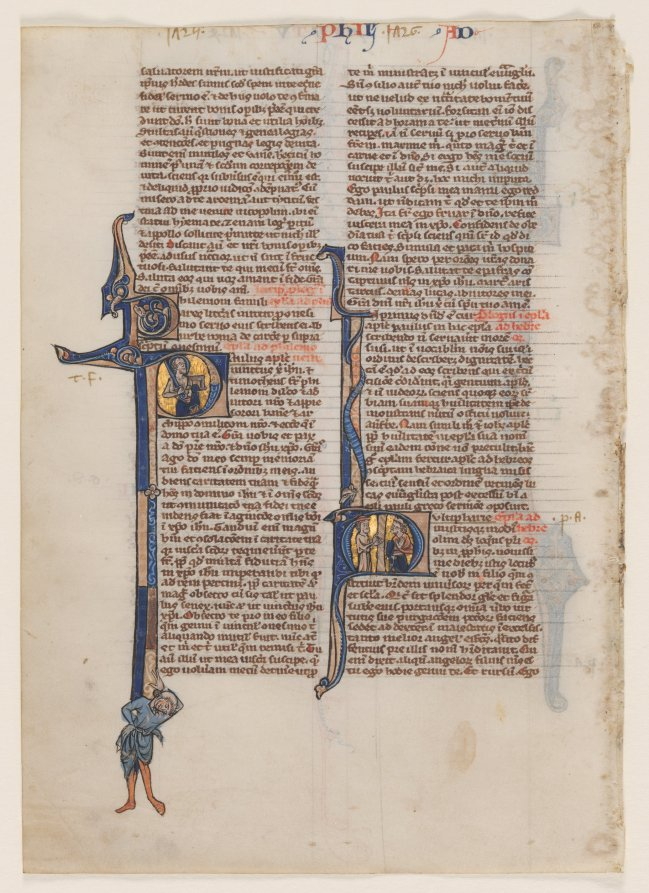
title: Leaf from a Latin Bible: Initial P: St. Paul with a Sword and a Book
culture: England, Oxford, 13th century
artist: circle or workshop of William de Brailes (English, active c. 1230)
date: c. 1230–40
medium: ink, tempera, and gold on vellum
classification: Manuscript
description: Circle of William de Brailes (England, Oxford) Single Leaf from a Latin Bible: Initial P: St. Paul Holding a Sword and a Book and Initial M: A Jew Discoursing with a King, about 1230-40 Ink, tempera, and gold on vellum The Jeanne Miles Blackburn Collection [Cat. no. 4] Few English illuminators are actually known by name. William de Brailes has been identified from documents that refer to his presence in Oxford. Moreover, his signature appears on one of seven detached psalter leaves now divided between Cambridge (Fitzwilliam Museum) and New York (Pierpont Morgan Library). It seems that several artists were working in the "de Brailes style," but it is not known whether these were organized members of his workshop or simply illuminators in the de Brailes circle. Typical of the de Brailes workshop is the use of drolleries (playful or sometimes comic figures that inhabit marginalia or initials). One such drollery, seen here, occupies the lower portion of the initial "P" introducing St. Paul's Epistle to Philemon. Wearing a scholar's cap, the drollery is contorted in pose, as if supporting the initial itself. This initial comes from a one-volume Bible, conveniently sized for portability and study. Such books were typically the products of lay workshops in academic towns like Oxford, Paris, and Bologna.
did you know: The initials in the margin, T.F. and P.A. are part of a unique system used by the Carthusians monks and indicate that this bible was likely used in a monastery.